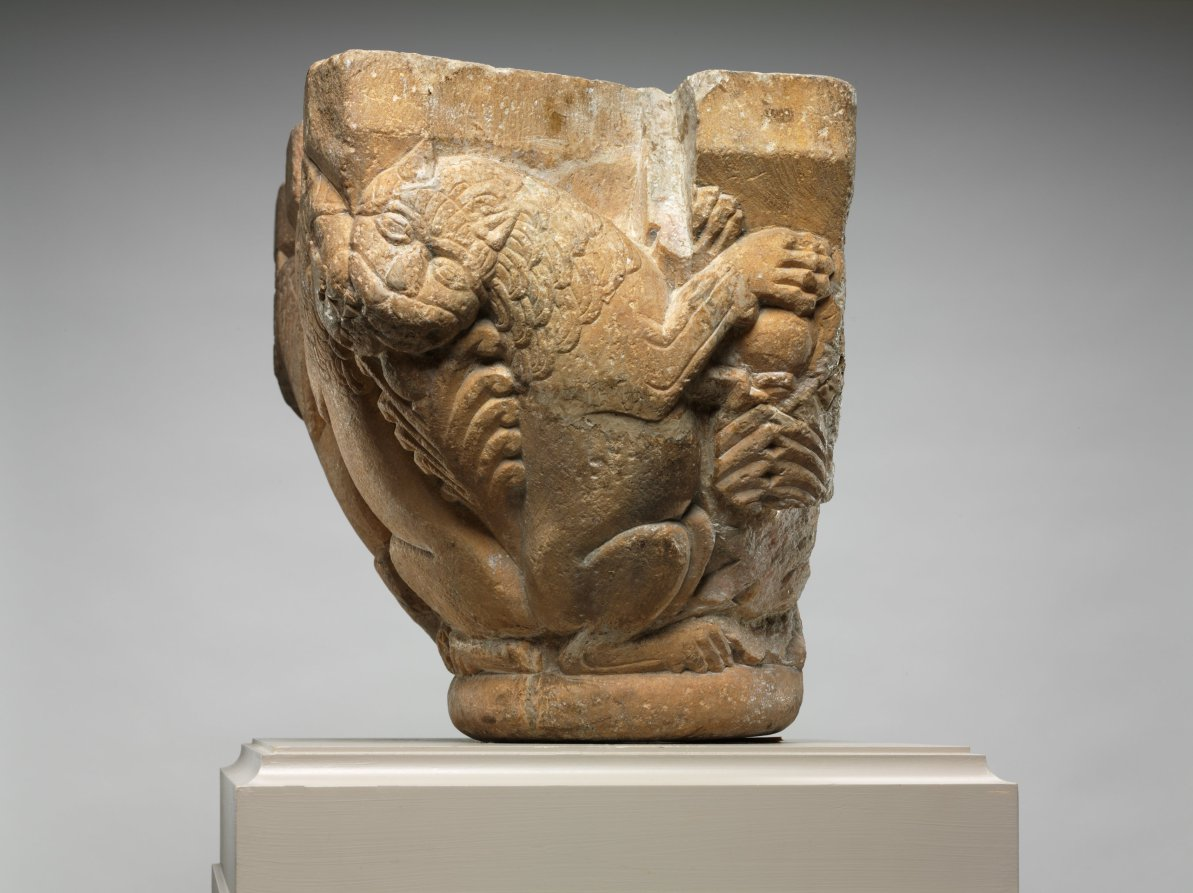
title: Engaged Capital with Lions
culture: Northern Spain (Navarre ?) or Southwest France (Pyrénées or Roussillon ?), mid-12th century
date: 1145–64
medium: marble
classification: Sculpture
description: The compositional motif of confronted and addorsed beasts illustrated on this capital was especially popular in churches along the pilgrimage roads.